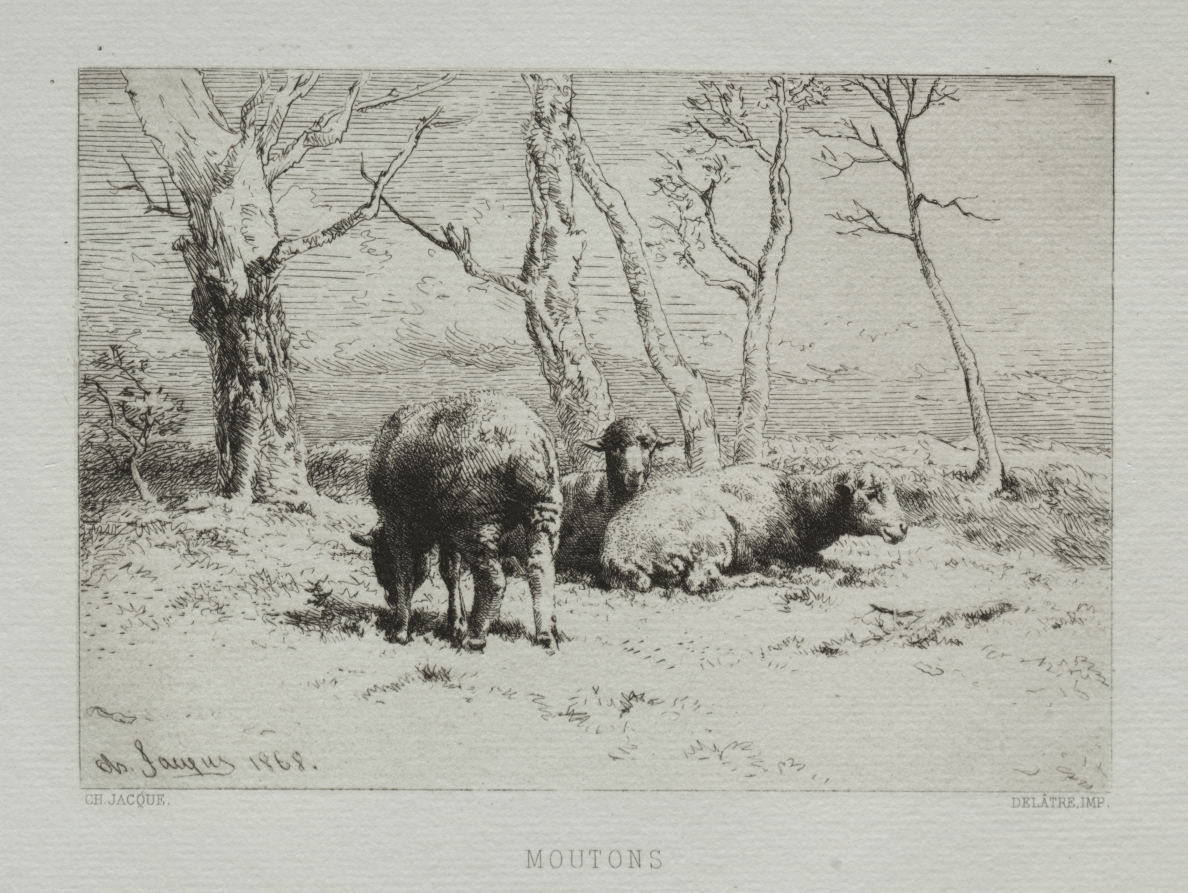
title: Sheep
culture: France, 19th century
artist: Charles-Émile Jacque (French, 1813–1894)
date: 1868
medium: etching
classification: Print